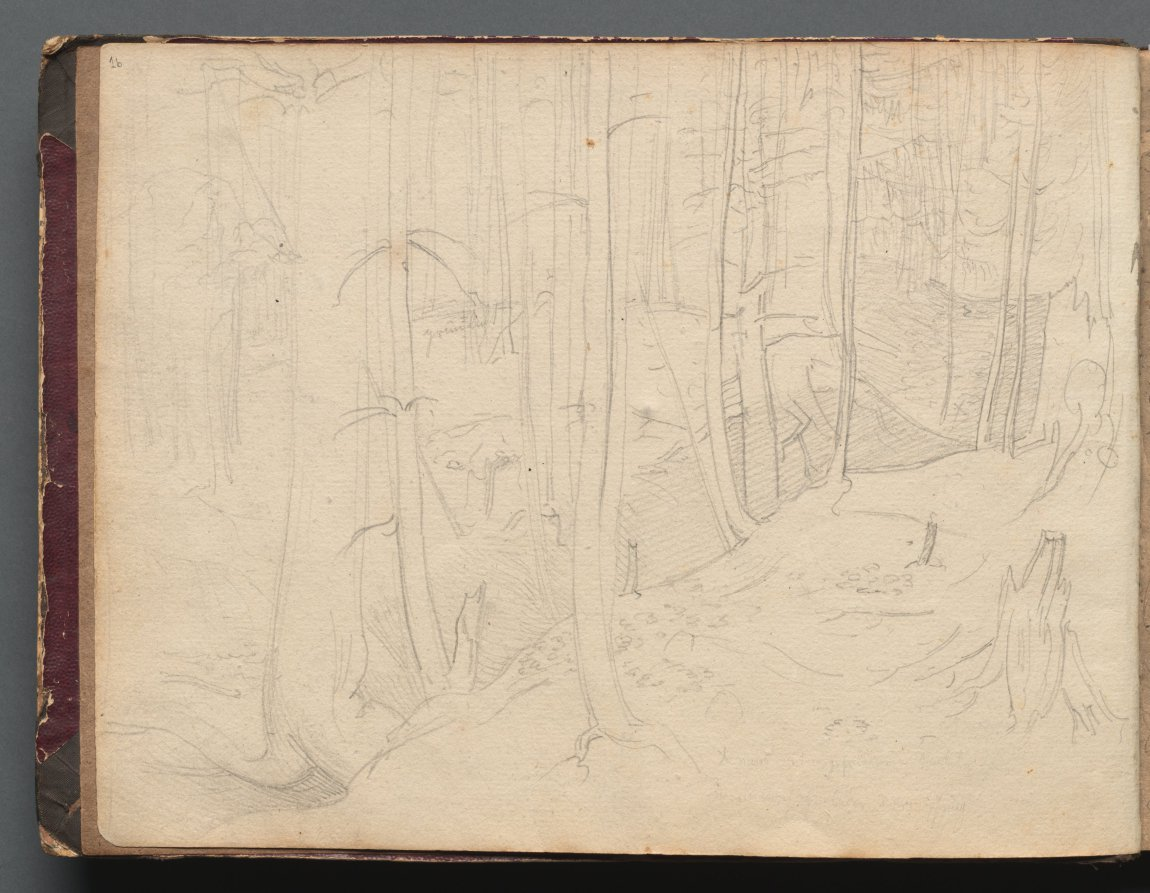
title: Album with Views of Rome and Surroundings, Landscape Studies, page 01b: Roman Landscape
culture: Germany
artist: Franz Johann Heinrich Nadorp (German, 1794–1876)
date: c. 1830s-70s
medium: graphite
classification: Bound Volume